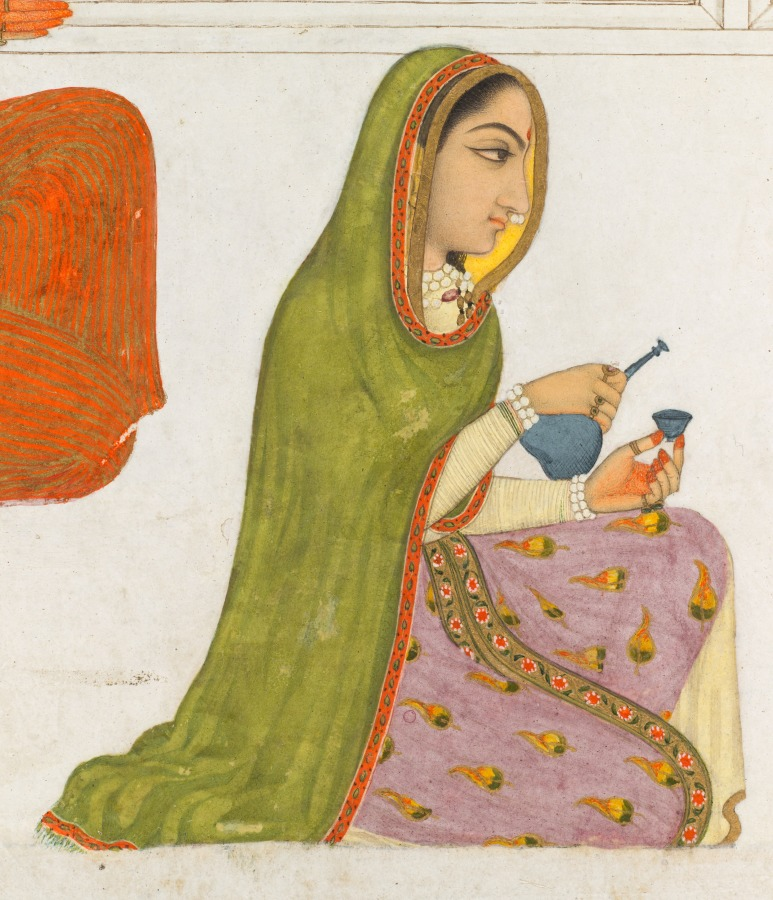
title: A princess reclining on a terrace with attendants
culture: India, Mughal, 18th century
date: c. 1730–1740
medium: Gum tempera and gold on paper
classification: Painting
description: This scene presents an idealized view of the life of a Mughal princess. Bejeweled and dressed in costly garments, she reclines on a couch set up on a white marble terrace. She watches two musicians sing and clap time, and a companion pours for her a cup of liquor. Two attendants stand behind, one waving a whisk to keep away the insects and another holding a box of paan, a betel-leaf preparation for freshening the breath. At the far right an older woman of the harem holds a fan while enjoying a hookah.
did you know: White is the color worn by widows.